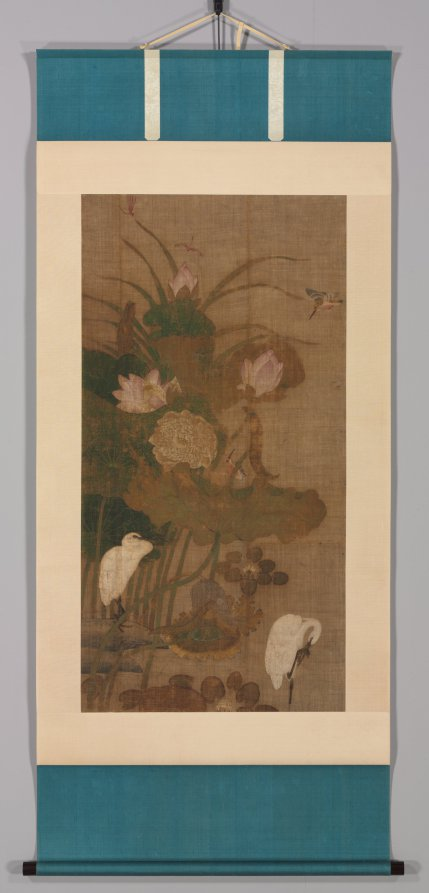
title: Lotuses, Insects, and Birds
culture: Korea, Joseon dynasty (1392–1910)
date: 1800s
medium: hanging scroll; ink and color on silk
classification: Painting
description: Pairs of herons, kingfishers, and dragonflies punctuate a profusion of lotus in this composition that, given the orientation of the herons and the clustering of motifs in the left-hand side of the work, may have once been the left painting of a pair. Given its subject matter, this hanging scroll may have been hung for display during the summer.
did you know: Given its subject matter of lotus flowers, herons, kingfisher, and dragonflies, this hanging scroll may have been hung for display during the summer.